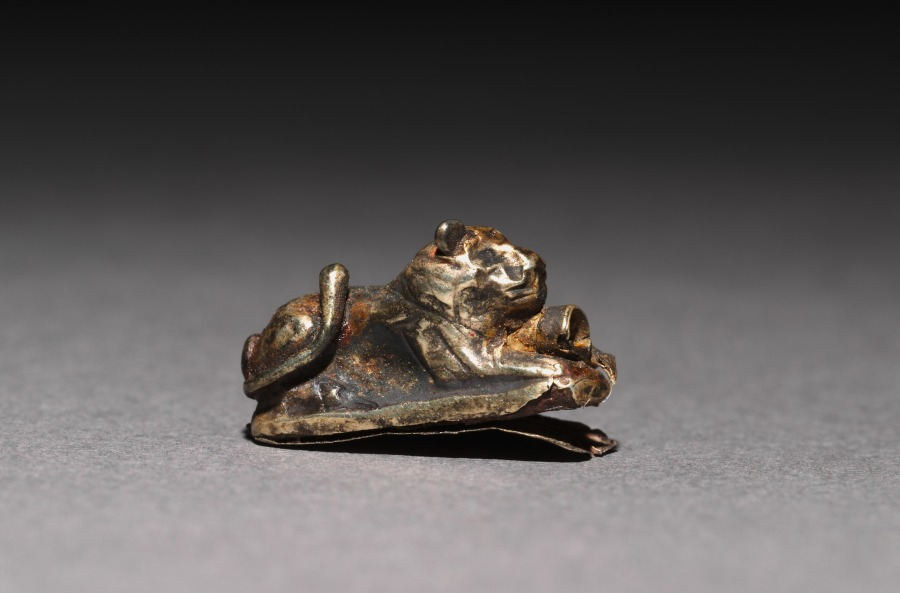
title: Recumbent Lion Beads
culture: Egypt, Middle Kingdom (2040–1648 BCE), Dynasty 12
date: 1980–1801 BCE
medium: electrum over a clay-bulked resin core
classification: Amulets